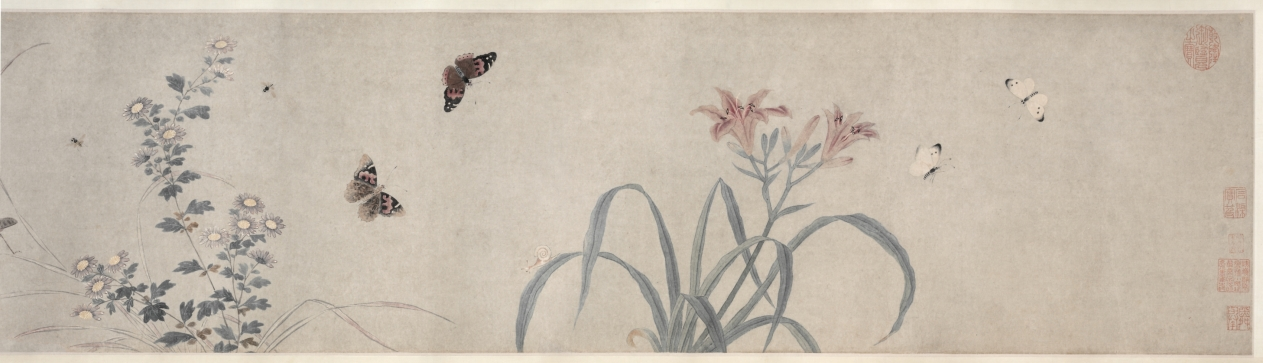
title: Insects and Flowers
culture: China, Qing dynasty (1644-1911) or Republican period (1912-49)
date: c. 1900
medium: Handscroll, ink and color on paper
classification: Painting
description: More than 26 feet long, this scroll presents insects, reptiles, and plants in delicate brushwork and pale colors, referring in style to earlier Southern Song dynasty (1127–1279) bird-and-flower paintings. Upon closer inspection, ants dismember a butterfly and reptiles wait to ambush their prey. An inscription at the end of the painting gives us an idea of its meaning: Attributed to the Qing dynasty scholar Zhang Xigeng (張錫庚, 1801–1861), the inscriber relates the work to an earlier painting by Qian Xuan (錢選, c. 1235–before 1307) and further suggests that the painting may allude to the relentlessness of natural selection. By drawing a parallel to tumultuous episodes in Chinese history, the writer might even hint at the domestic rebellions and the aggression of Western powers against China in his lifetime, particularly the Opium Wars (1839–60).